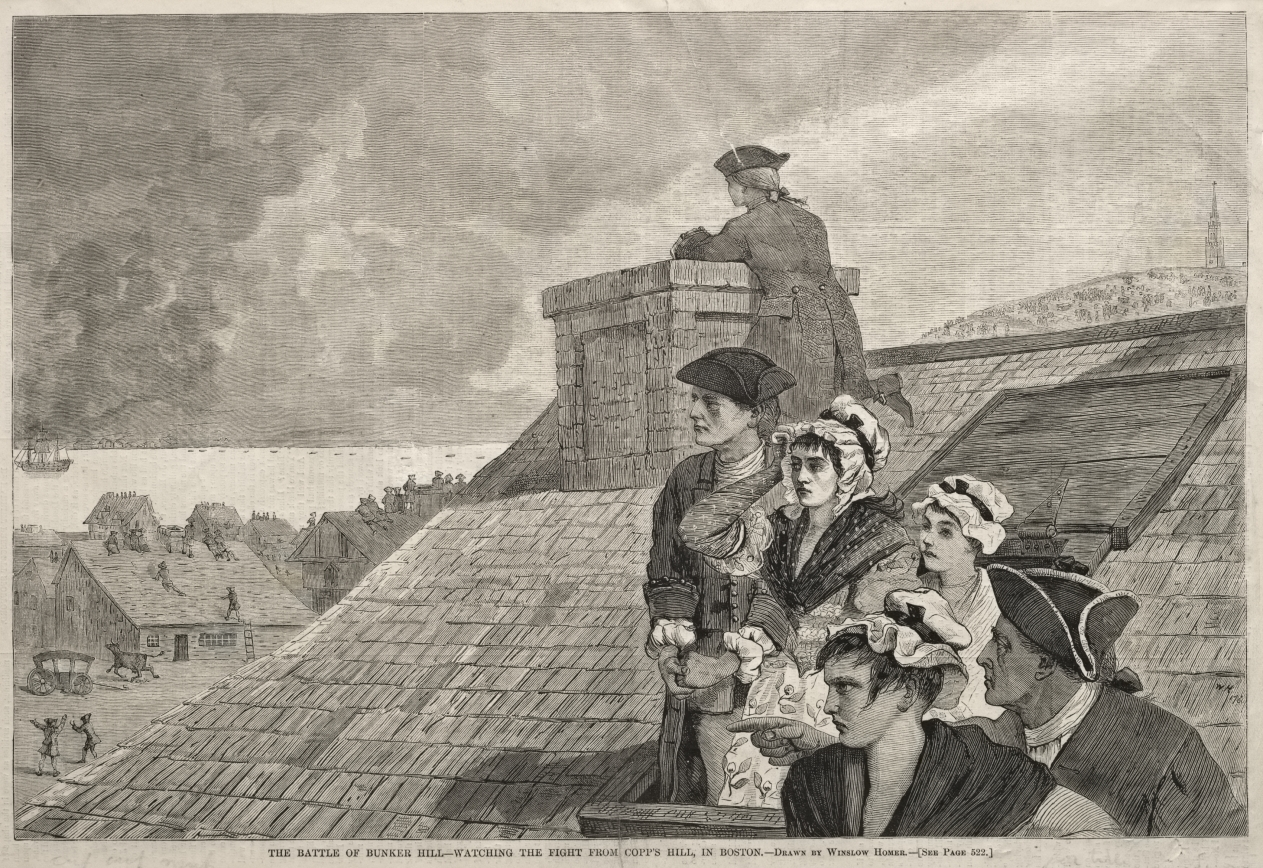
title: The Battle of Bunker Hill - Watching the Fight from Copp's Hill, in Boston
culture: America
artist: Winslow Homer (American, 1836–1910)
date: 1875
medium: wood engraving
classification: Print